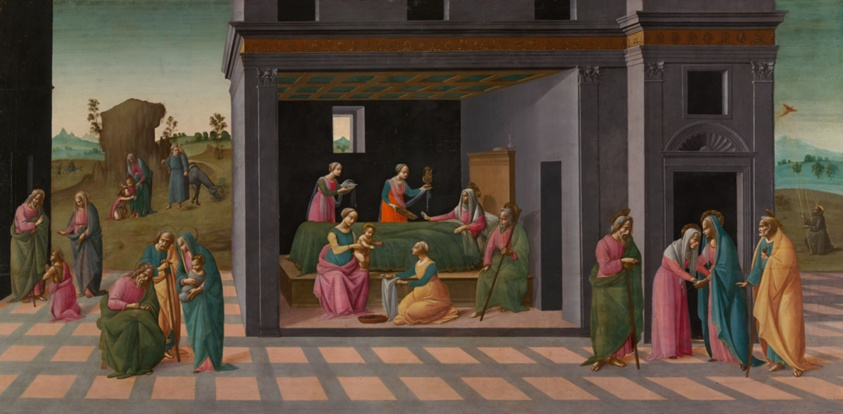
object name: Painting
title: Scenes from the Life of Saint John the Baptist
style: Renaissance, 15th century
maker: Bartolomeo di Giovanni (Italian, active c. 1465-1501)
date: 1490/95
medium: Tempera on panel (poplar)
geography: Italy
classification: painting; Italian; tempera; european painting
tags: Saint John the Baptist, interior, saints, Christian subjects, Christianity, religious, religion